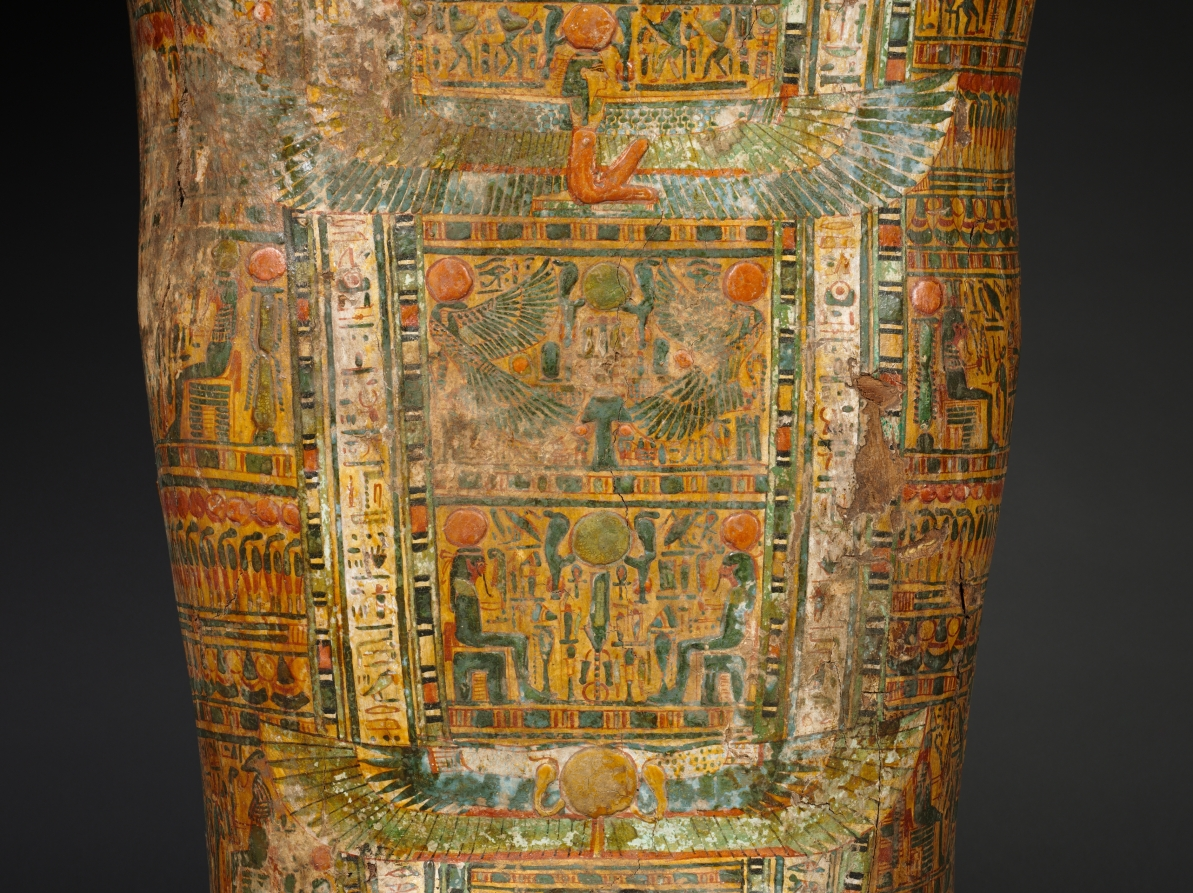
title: Coffin of Nesykhonsu (lid)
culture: Egypt, Third Intermediate (1069–715 BCE), Dynasties 21–22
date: c. 976–889 BCE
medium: gessoed and painted sycamore fig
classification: Funerary Equipment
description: A complete set of coffins during the late New Kingdom and Third Intermediate Period consisted of an outer and inner coffin and a mummy board (essentially a lid without a case, placed directly over the wrapped mummy). Judging by its size, this must have been Nesykhonsu's outer coffin. The type is essentially the same as the coffin of Bakenmut, which was also an outer coffin. The two coffins are said to have been found together and to have belonged to a man and wife. This is quite possible, although the inscriptions do not bear it out. Bakenmut is not mentioned on Nesykhonsu's coffin, nor is she mentioned on his. There was by this time a tremendous repertoire of scenes appropriate for coffin decoration. Whereas Bakenmut's coffin features images of deified dead pharaohs, Nesykhonsu's is decorated in a more personal way with scenes from her own funeral. The main scene in the interior (near the top) shows a priest clad in a panther skin with the mummy of Nesykhonsu behind. The god appears in mummy form and wears a sun disk on his head. The scarab beetle inside the sun disk identifies him as Khepri, the morning sun, and the hieroglyphs to the right identify him as Atum, the evening sun. Taken together, image and text represent the sun god in both his rising and setting, youthful and aged aspects.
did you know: Two of Nesykhonsu's titles, "Lady of the House" and "Singer of the Choir of Mut the Great," are written on the outside of the coffin.